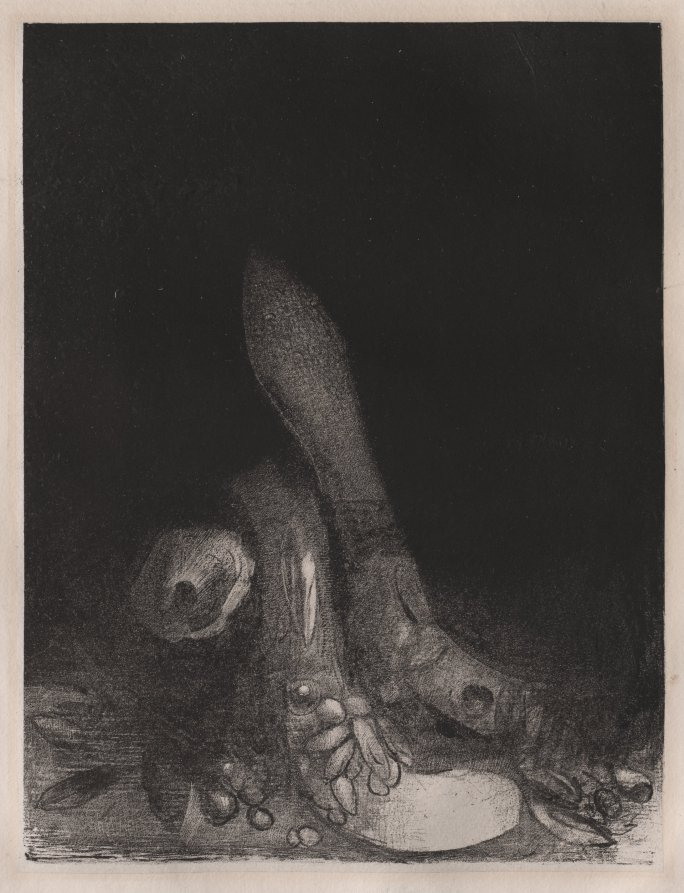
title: Flowers Fall and the Head of a Python Appears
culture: France, 19th century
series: The Temptation of St. Anthony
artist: Odilon Redon (French, 1840–1916)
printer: Blanchard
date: 1896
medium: lithograph on China paper laid on Arches wove paper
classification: Print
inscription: inscribed at lower left, in graphite: M 138; at bottom center: 47-221-4 As[illeg.] 180 00